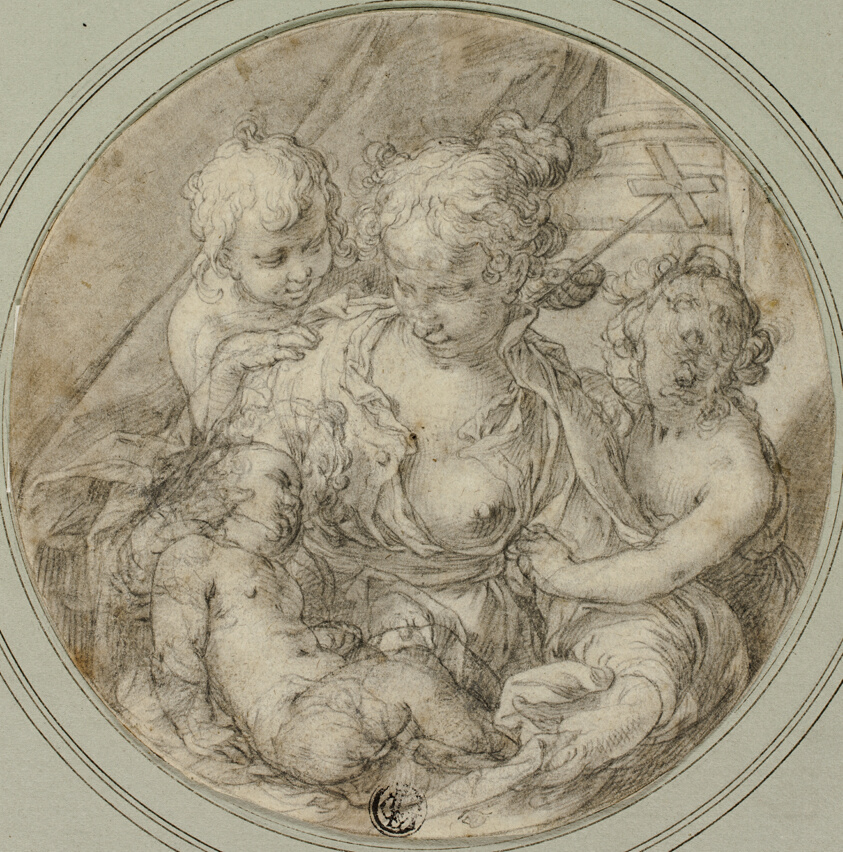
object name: Drawing and Watercolor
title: The Madonna with the Christ Child, with the infant John the Baptist and another Child (Caritas)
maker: Attributed to Joachim Anthonisz. Wtewael; (Dutch, 1566-1638)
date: c. 1595-1605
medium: Black chalk on ivory laid paper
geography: Netherlands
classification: chalk; drawings (visual works); prints and drawing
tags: mothers, children, babies